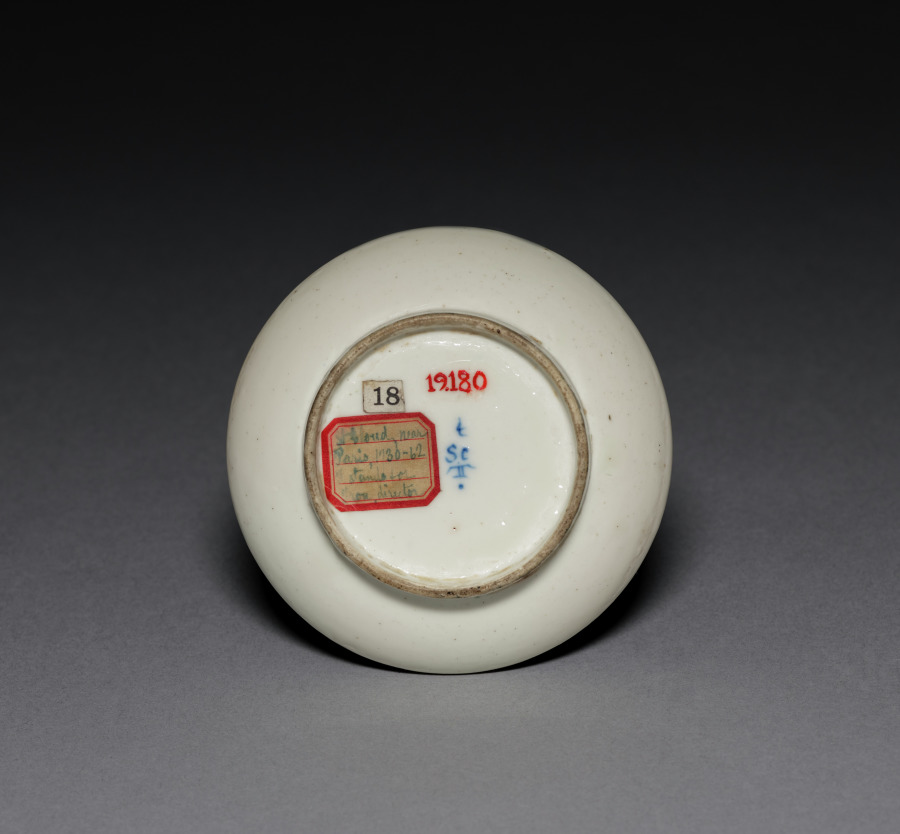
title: Saucer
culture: France, Saint Cloud, 18th century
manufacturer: Saint Cloud Porcelain Factory (French)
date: 1730–62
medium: soft-paste porcelain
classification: Ceramic